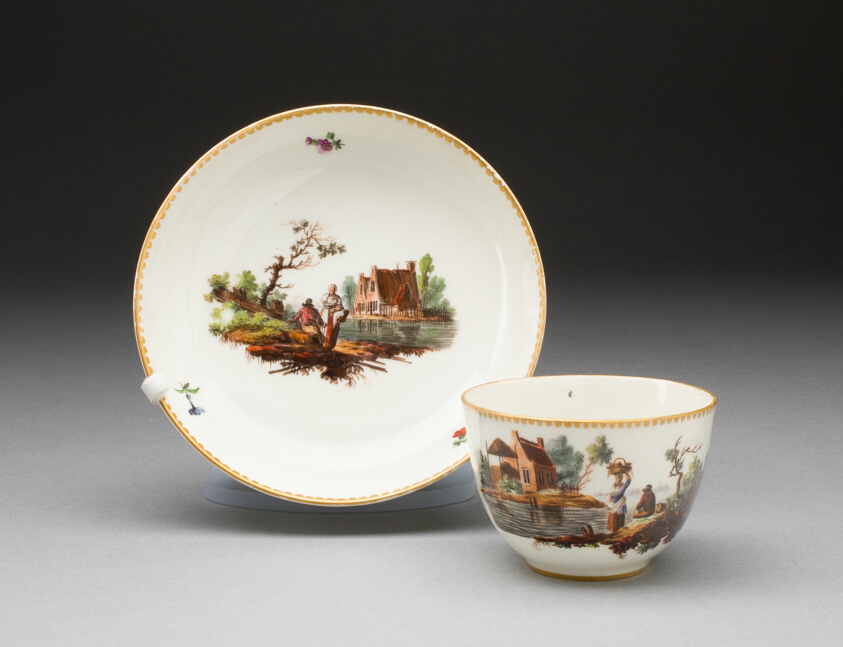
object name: Ceramics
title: Cup and Saucer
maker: Amstel Porcelain Factory (Netherlands, 1784-1814)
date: 18th century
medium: Porcelain, polychrome enamels, and gilding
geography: Oude Amstel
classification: drinking vessel; porcelain; european decorative arts; ceramics